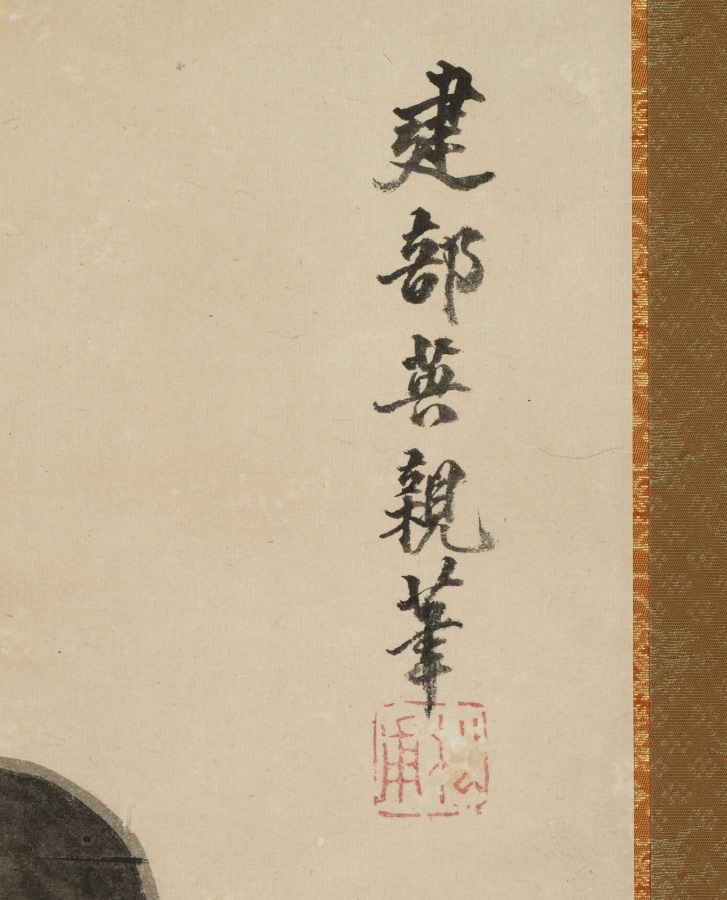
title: Genre Figures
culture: Japan, Edo period (1615–1868)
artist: Takebe Sōchō (Japanese, 1760–1814)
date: c. 1816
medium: hanging scroll; ink and color on paper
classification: Painting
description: Though rarely mentioned in official histories, Sōchō was an accomplished painter whose talent is readily apparent to the modern eye. For his compositions he chose traditional Japanese stories or everyday events. This scroll is part of a triptych of paintings converted from the folding screen format into the hanging scroll format.